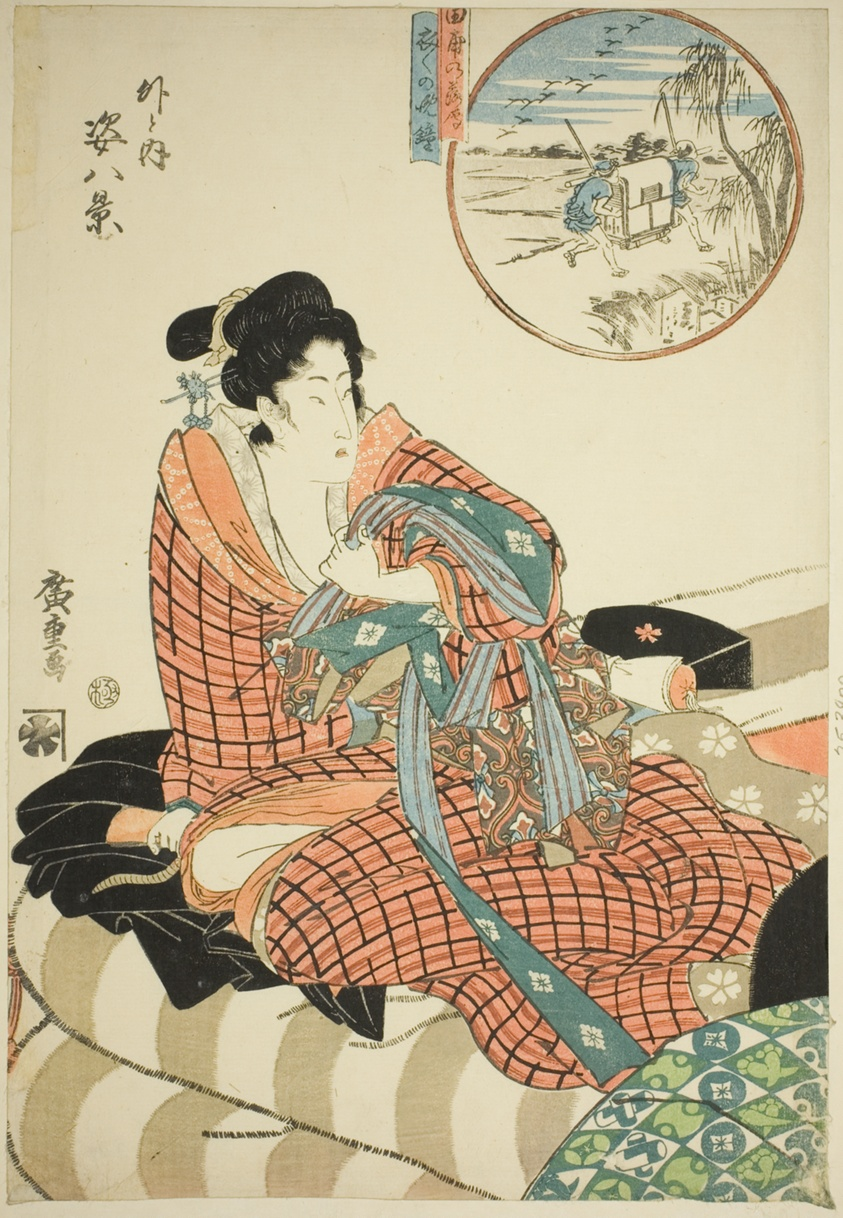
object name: Print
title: Descending Geese at the Rice Fields (Tanbo no rakugan) and Evening Bell of the Morning After (Kinuginu no bansho), from the series "Eight Views of Figures Inside and Outside (Soto to uchi sugata hakkei)"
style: Japanese (culture or style)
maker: Utagawa Hiroshige 歌川 広重; Japanese, 1797-1858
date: 19th century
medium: Color woodblock print; oban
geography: Japan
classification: woodblock print; print; asian art